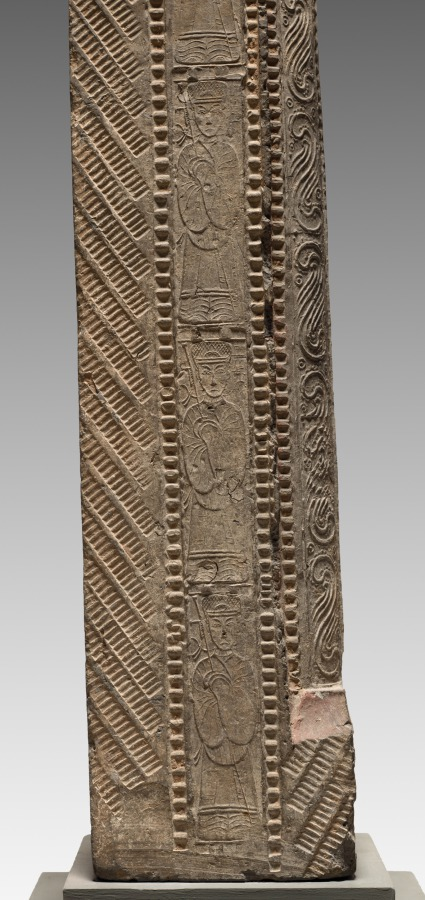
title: Hollow Tile: Column from Tomb-Chamber Doorway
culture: China, Han dynasty (202 BCE–220 CE)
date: 100–200 CE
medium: earthenware, die-stamped relief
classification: Ceramic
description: Striding tigers (top), racing horsemen (right column), and reverent officials (left column) are stamped into the surface of this underground portal to a tomb. The doorway preserves in stone the post-and-lintel structure, a basic element of Chinese wooden architecture. By the first century AD, a revolution in Chinese tomb construction and furnishing had taken place. Tombs lined with decorated bricks and tiles replace the earlier tombs constructed with only rammed earth-walls. Ceramic surrogates or models of stoves, houses, servants, and pets filled these more durable chambers, symbolically extending the creature comforts of this world into the world after death.